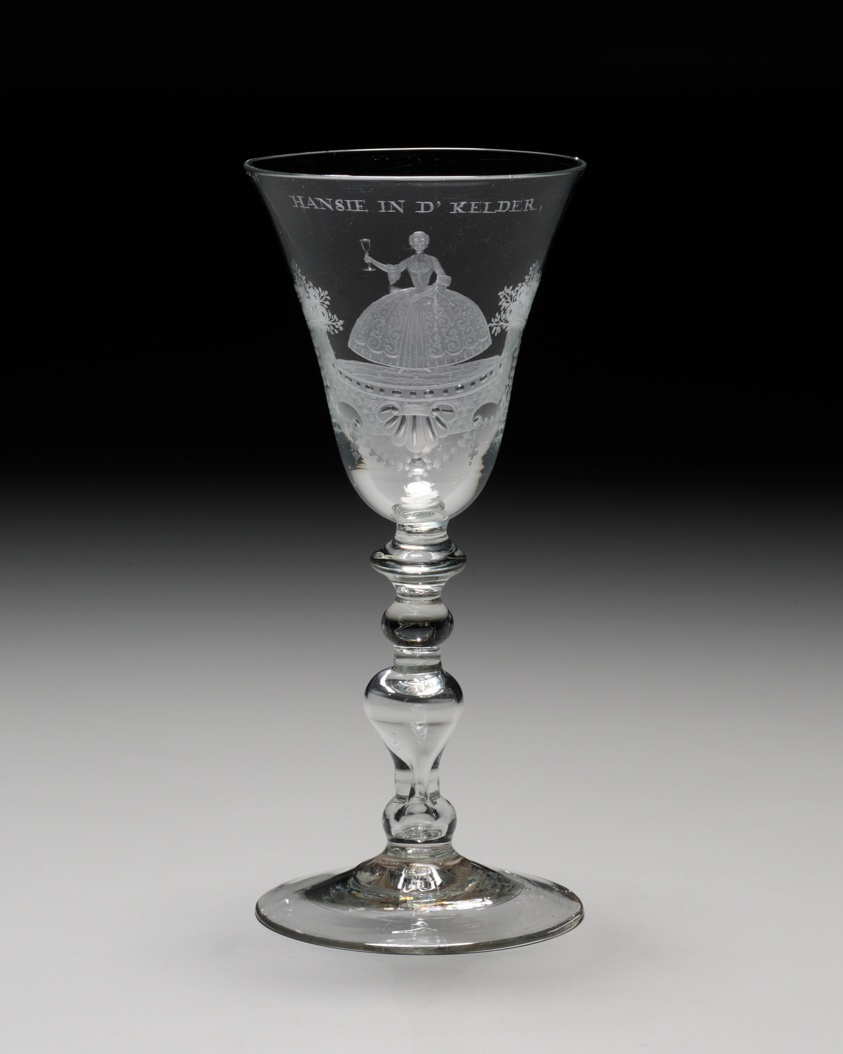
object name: Glass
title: Wine Glass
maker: Netherlands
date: Mid 18th century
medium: Glass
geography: Netherlands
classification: drinking vessel; glass; european decorative arts